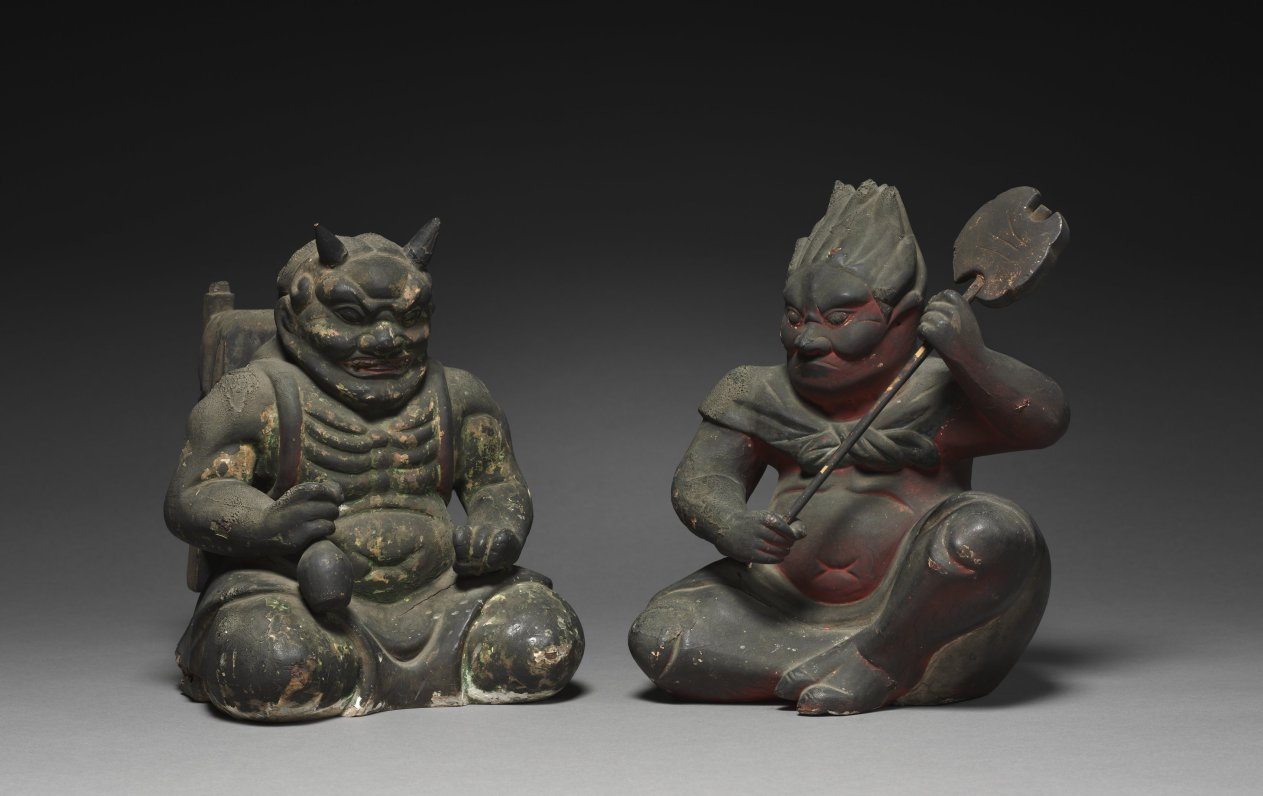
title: Seated Zenki and Koki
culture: Japan, Muromachi period (1392–1573)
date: 1400s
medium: wood with pigment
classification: Sculpture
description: The axe-wielding red Zenki, and the vase-porting, bamboo backpack-wearing green Koki are both under the mystical control of the monk, En no Ozunu (legendarily 634–701), also known as En no Gyōja, or “En the Ascetic,” and considered to have founded Shugendō, a style of religious practice focused on performing austerities in mountainous settings.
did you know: A popular Japanese comic named Zenki was inspired by the figure seen here wielding a weapon.